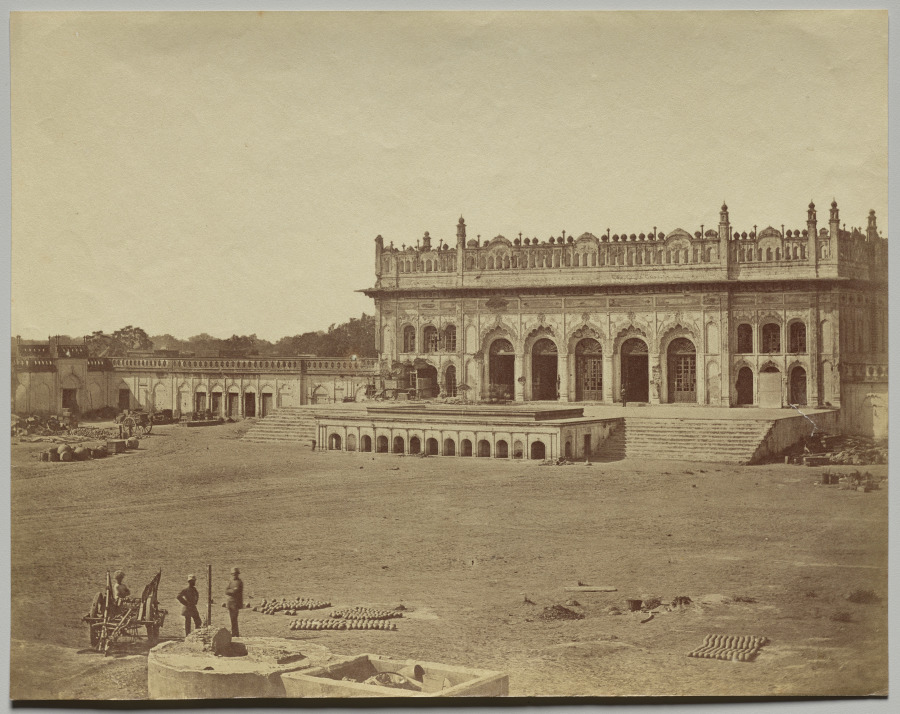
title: The Small Imambara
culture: England, 19th century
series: Lucknow After the Siege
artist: Felice A. Beato (British, 1832–1909)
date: 1858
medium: albumen print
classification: Photograph